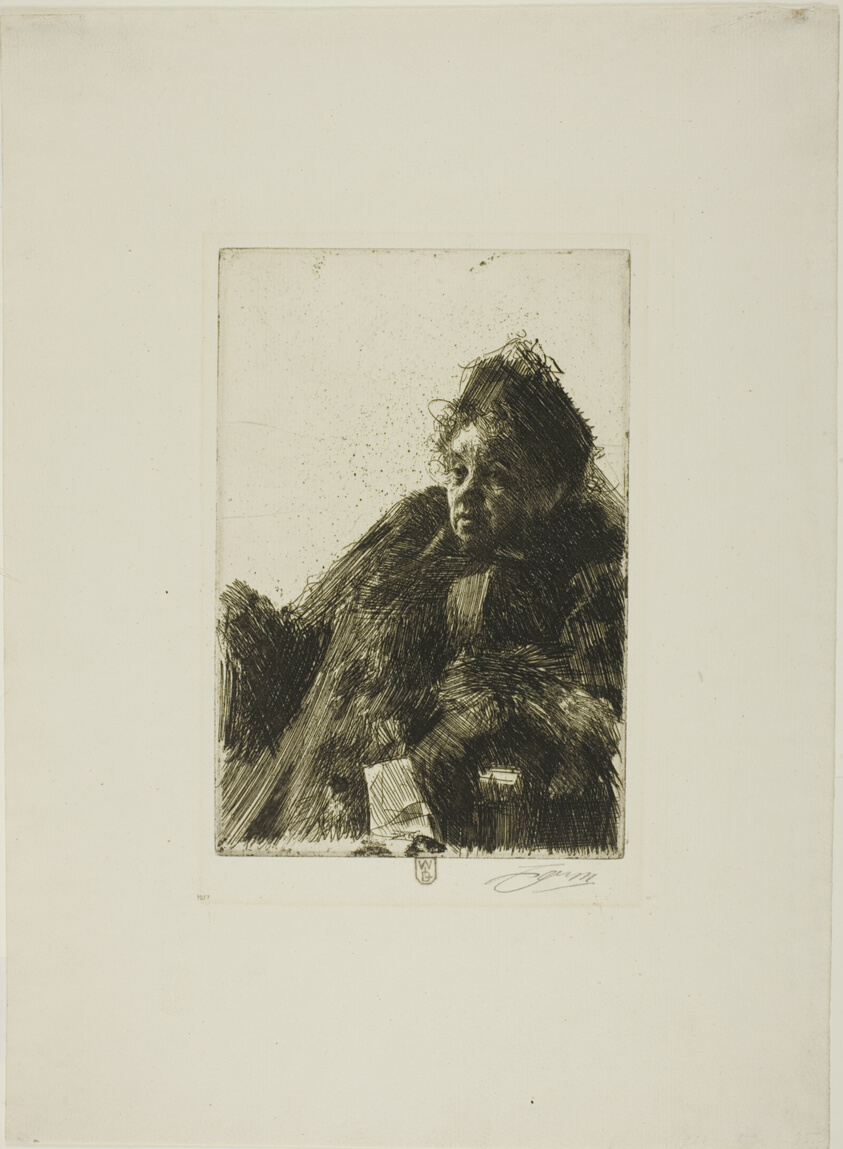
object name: Print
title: Mme Simon II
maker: Anders Zorn (Swedish, 1860-1920)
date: 1891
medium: Etching on ivory laid paper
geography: Sweden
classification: etching; print; prints and drawing